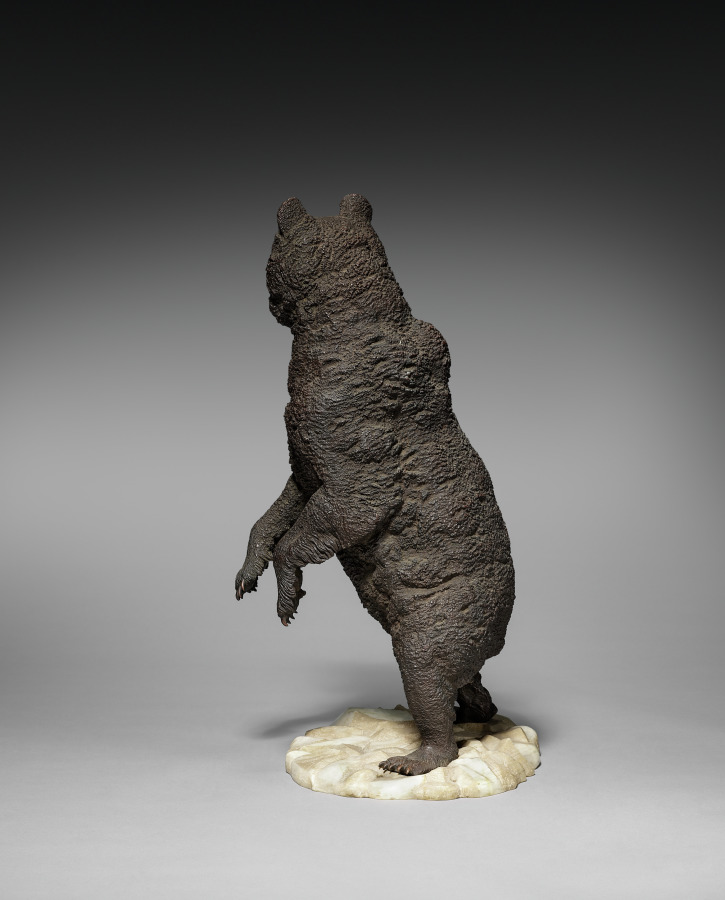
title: Bear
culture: Japan, Meiji period (1868–1912) to Shōwa period (1926–89)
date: c. 1900–1947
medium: bronze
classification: Sculpture